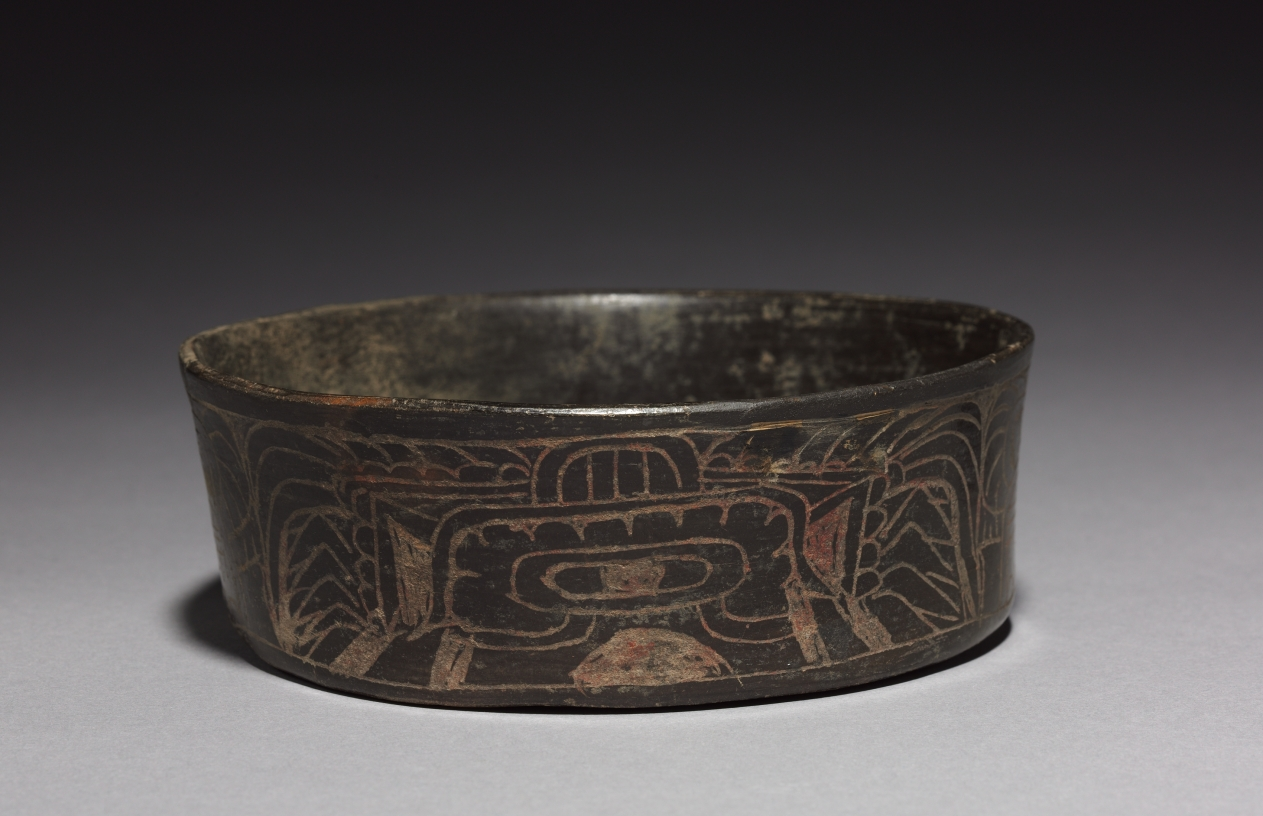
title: Bowl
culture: Central Mexico, Teotihuacán, Classic period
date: 1–550 CE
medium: ceramic, pigment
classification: Stone